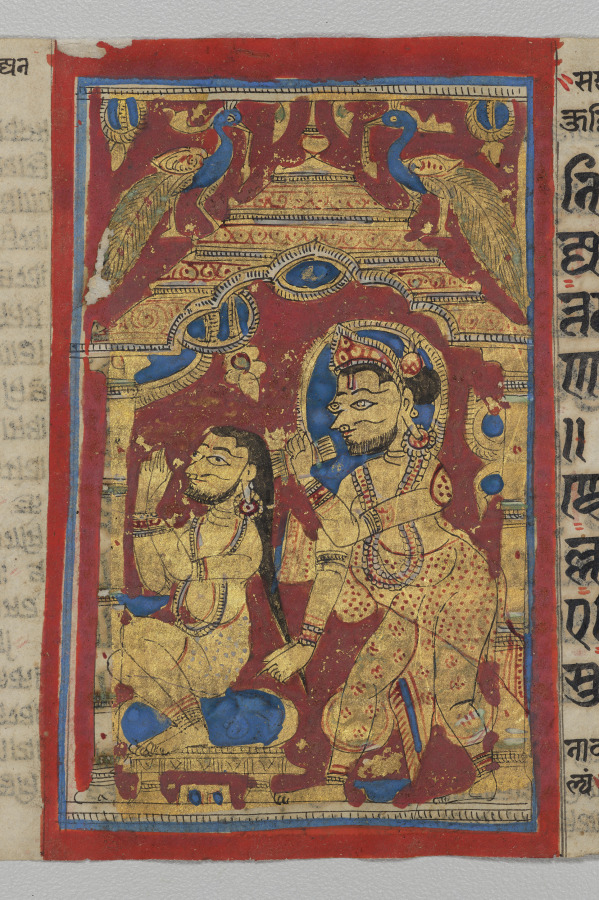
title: King Siddhartha's Morning Bath, Folio 22 (verso), from a Kalpa-sutra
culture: Western India, Gujarat, last quarter of the 15th century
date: c. 1475–1500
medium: Gum tempera, ink, and gold on paper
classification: Painting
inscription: [[upper left]] siddhārtharājā snānamajjan